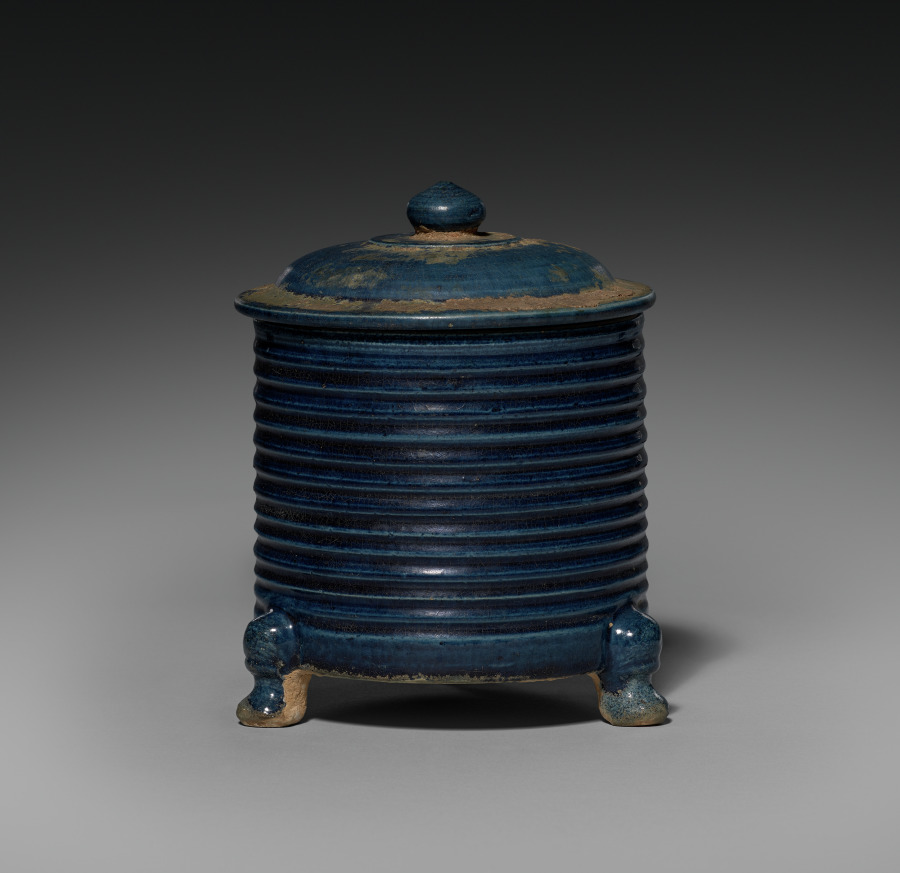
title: Covered Jar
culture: China, Tang dynasty (618–907)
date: early 700s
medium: glazed earthenware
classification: Ceramic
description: This covered cylindrical jar with three animal feet is lavishly covered with a cobalt blue glaze in the exterior and an amber glaze in the interior. Of the colored lead glazes of sancai (three-color) ware, blue was preeminent and precious. Imported cobalt from Persia (Iran, Afghanistan) was used as a glaze colorant that yields a rich, brilliant blue of considerable splendor.